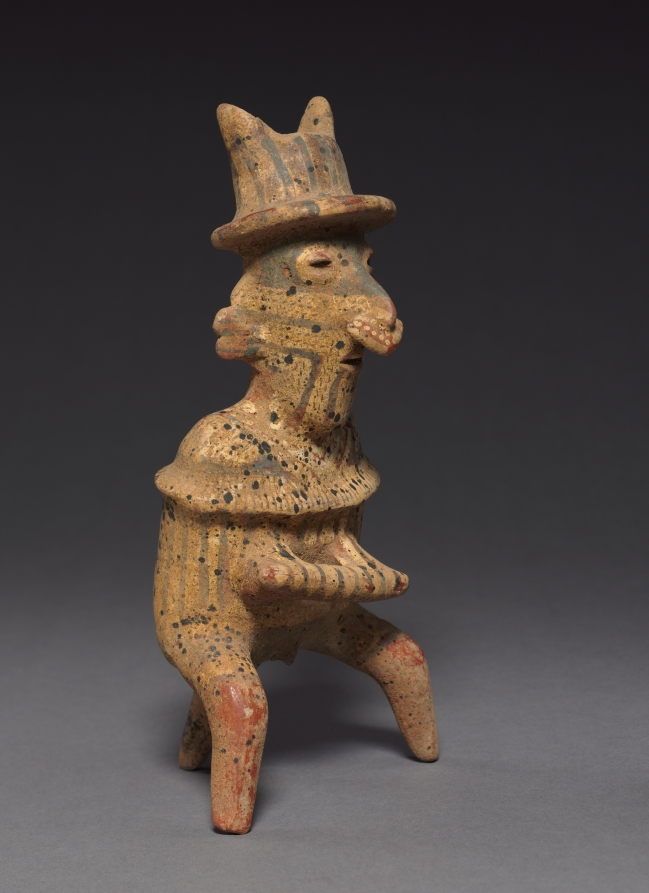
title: Seated Male Holding Chief’s Baton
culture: Mesoamerica, West Mexico, Nayarit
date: 200 BCE–300 CE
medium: ceramic, pigment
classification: Ceramic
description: The ancient artists of West Mexico specialized in ceramic sculptures in a range of sizes, investing their creations with a warm humanity regardless of scale. This tripod-shaped figure represents a well-dressed chief holding a baton of authority.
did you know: This tripod-shaped figure represents a well-dressed chief holding a baton of authority.